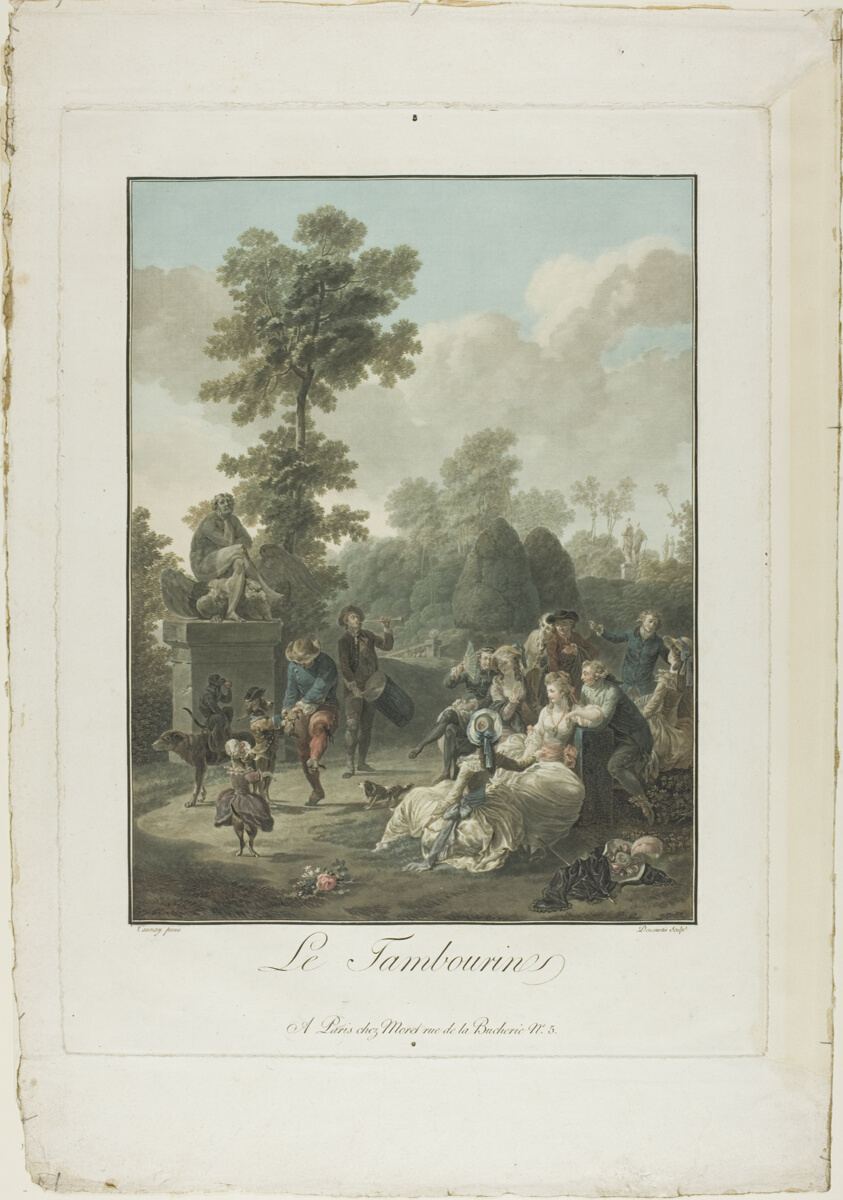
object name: Print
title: Le Tambourin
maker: Charles-Melchior Descourtis (French, 1753-1820); after Nicolas-Antoine Taunay (French, 1755-1830)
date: 1789/94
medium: Color aquatint (ash manner), with etching and engraving, on ivory wove paper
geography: France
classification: aquatint; print; prints and drawing